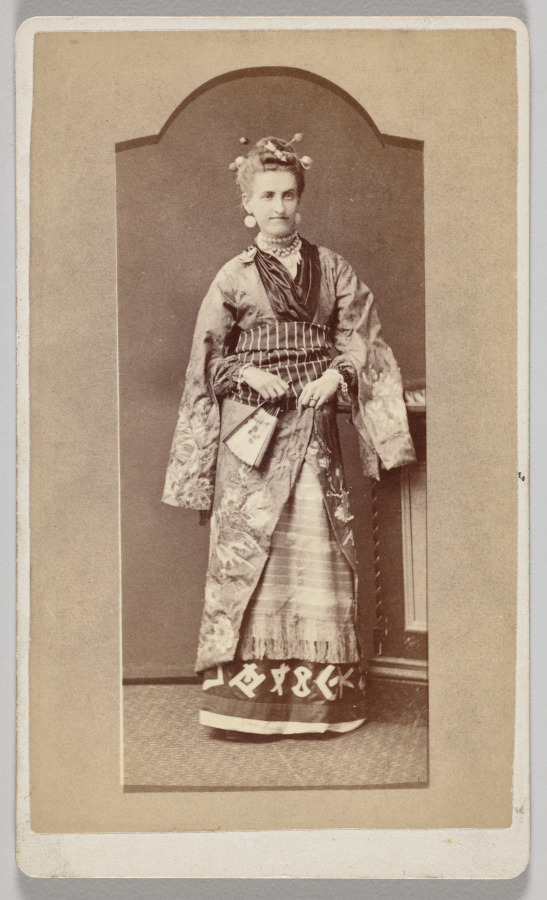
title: Untitled (white woman in Japanese kimono with fan)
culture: Unknown, 19th century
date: 1890s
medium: gelatin silver print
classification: Photograph